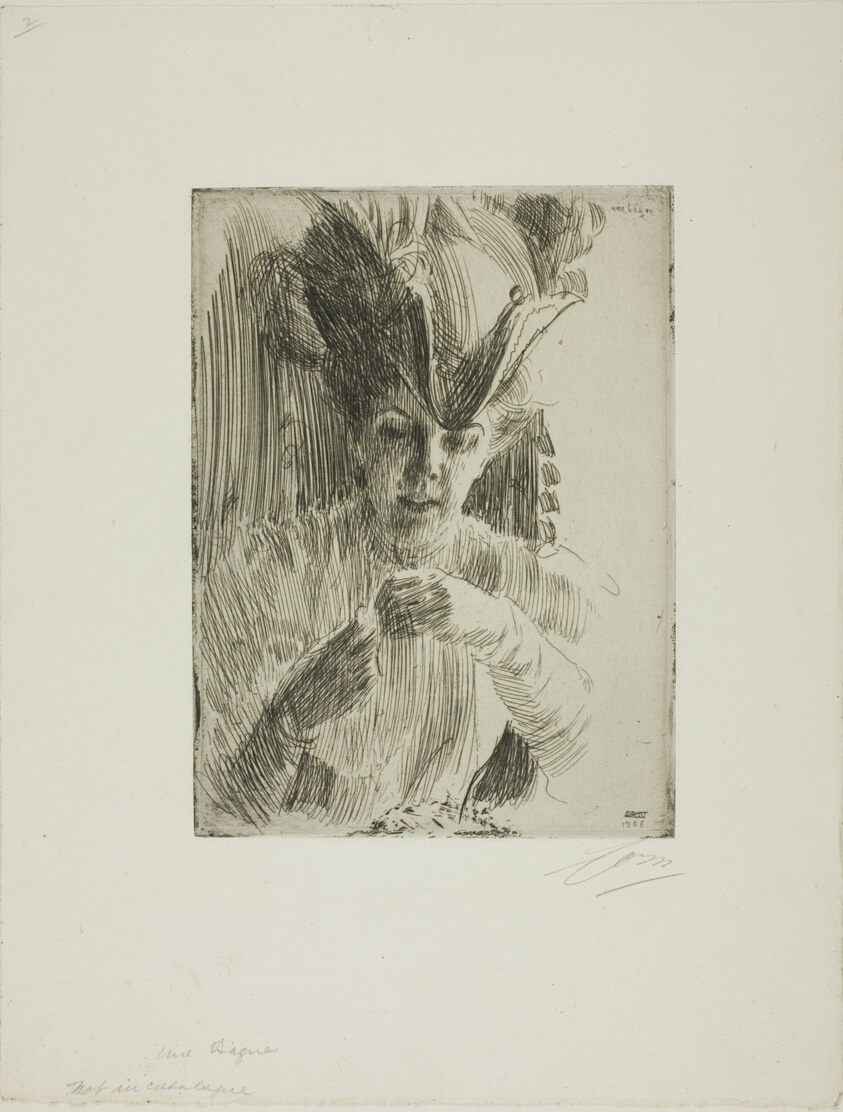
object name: Print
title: A Ring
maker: Anders Zorn (Swedish, 1860-1920)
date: 1906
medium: Etching on ivory laid paper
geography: Sweden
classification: etching; print; prints and drawing